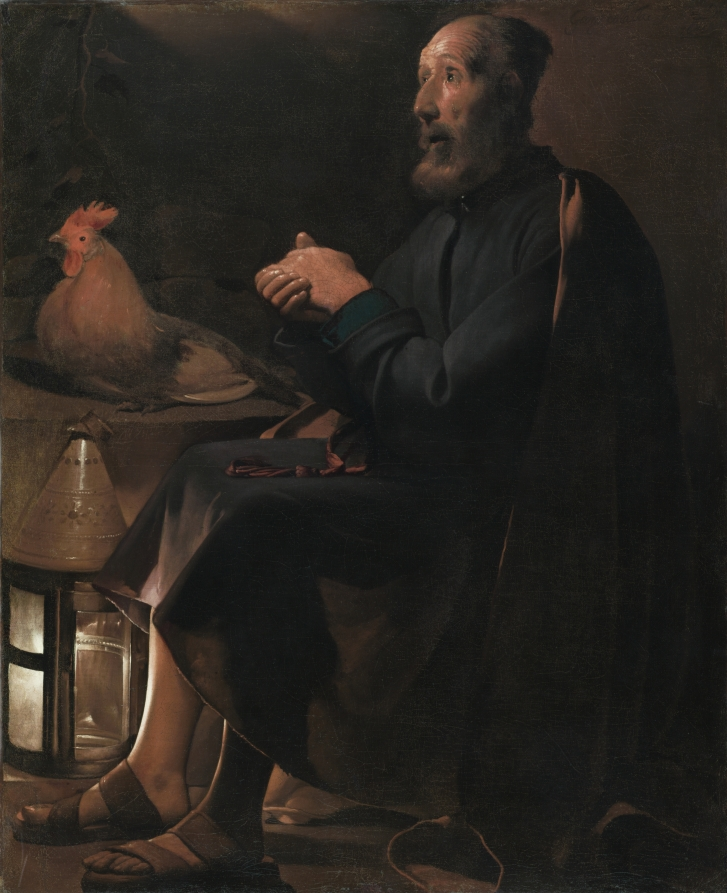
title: Saint Peter Repentant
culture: France, 17th century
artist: Georges de La Tour (French, 1593–1652)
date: 1645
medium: oil on canvas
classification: Painting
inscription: signed upper right: Georgs delaTour Invet et Pin / 1645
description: During Jesus’s arrest on the night of the Last Supper, the apostle Peter denied knowing him. Although Christ forgave his betrayal, Peter was consumed by guilt. Georges de La Tour represents Peter as an old man, reflecting on his past actions in a state of perpetual repentance. The apostle’s red-rimmed eyes and the uncertain light of the lantern suggest anxious sleepless nights; muted colors and simple forms give visual expression to Peter’s somber emotions. Unlike other artists inspired by Caravaggio, La Tour worked in relative isolation in northeastern France, and his connection to his Italian counterpart remains unclear.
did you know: The rooster next to Peter is a reference to Jesus's prediction that Peter will betray him, stating: "Before the rooster crows, you will disown me three times."